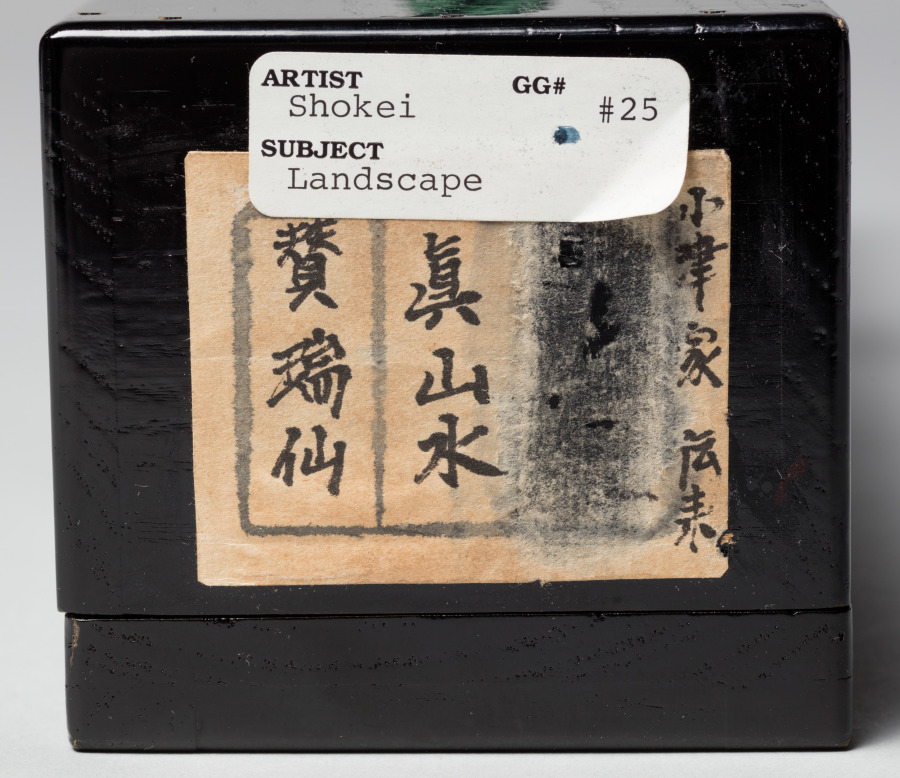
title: Landscape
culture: Japan, Muromachi period (1392–1573)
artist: attributed to Kenkō Shōkei (Japanese, active 1478–1506)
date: late 1400s–early 1500s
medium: hanging scroll, ink and light color on paper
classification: Painting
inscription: inscription above signed Shō'u Kojin; calligraphy by the Shokōji priest Tōgan Zuisen 桃源瑞仙 (1430–89)